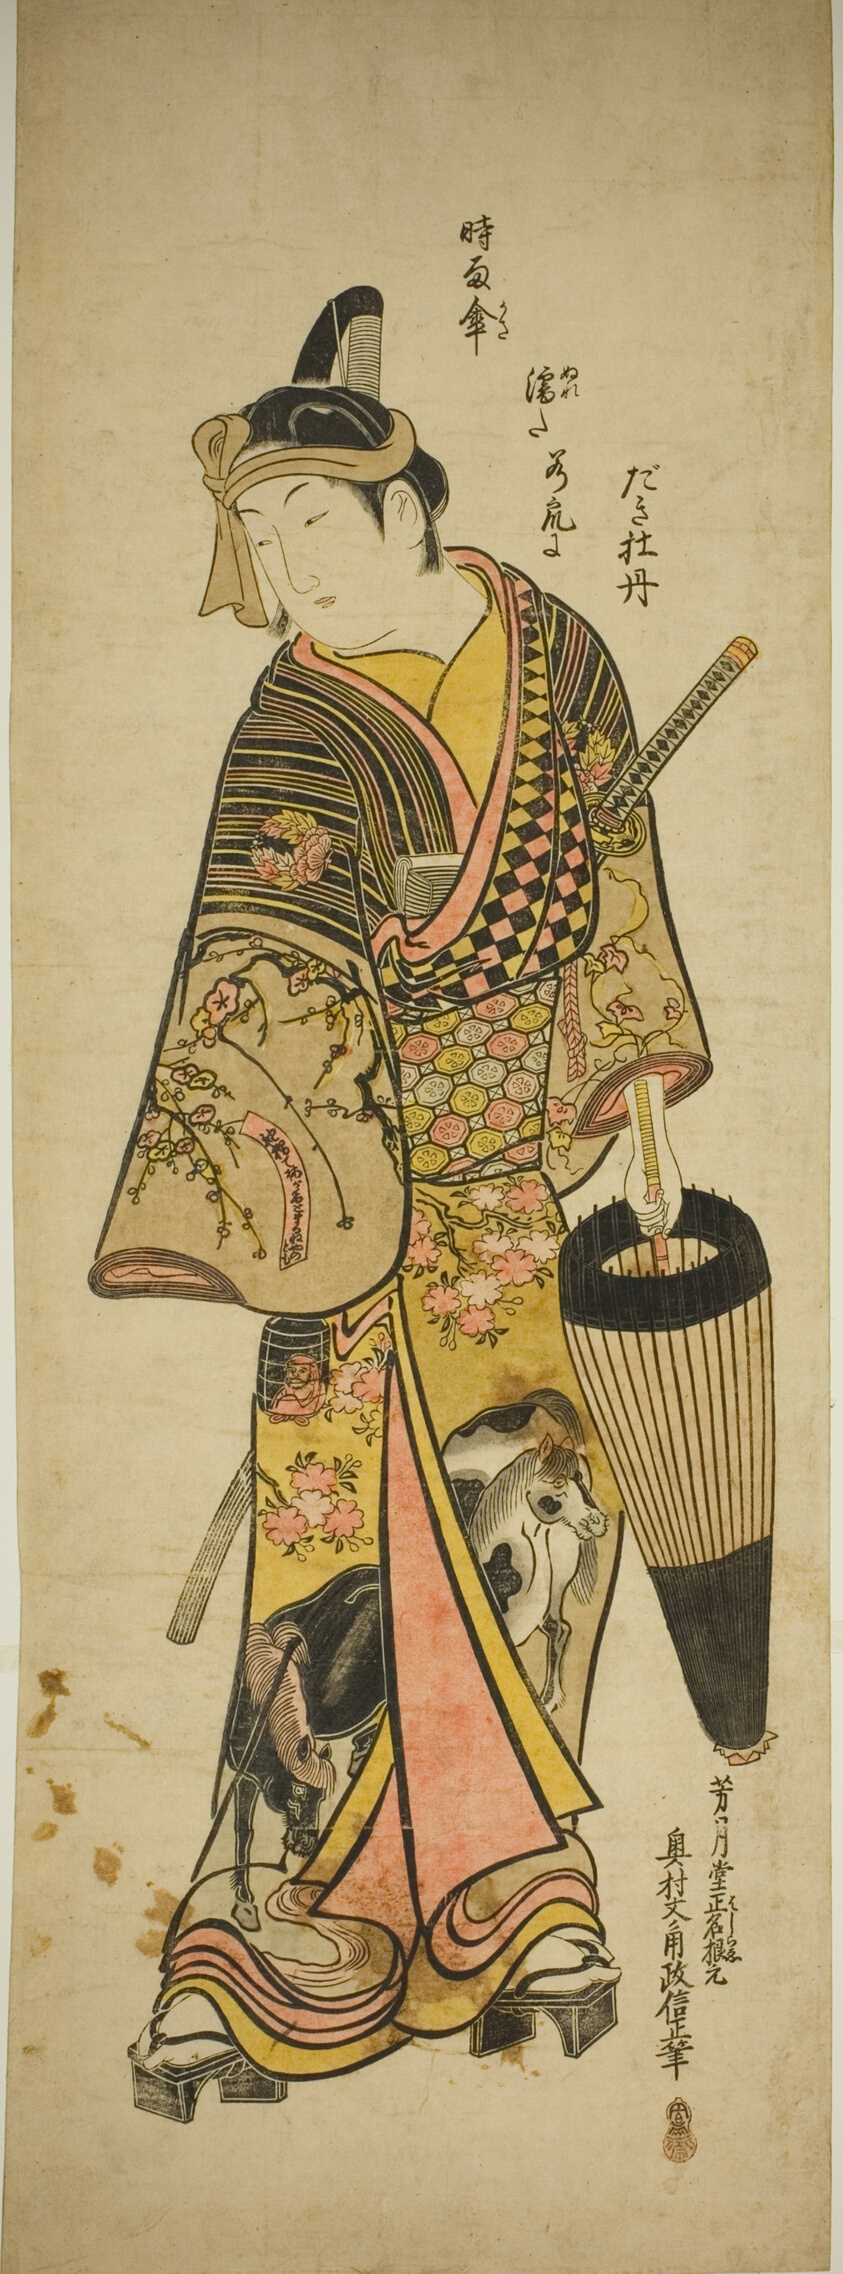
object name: Print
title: Actor Ichikawa Danjuro II as Sukeroku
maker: Okumura Masanobu (Japanese, 1686-1764)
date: c.1740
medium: Color woodblock print; beni-e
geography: Japan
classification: woodblock print; print; asian art